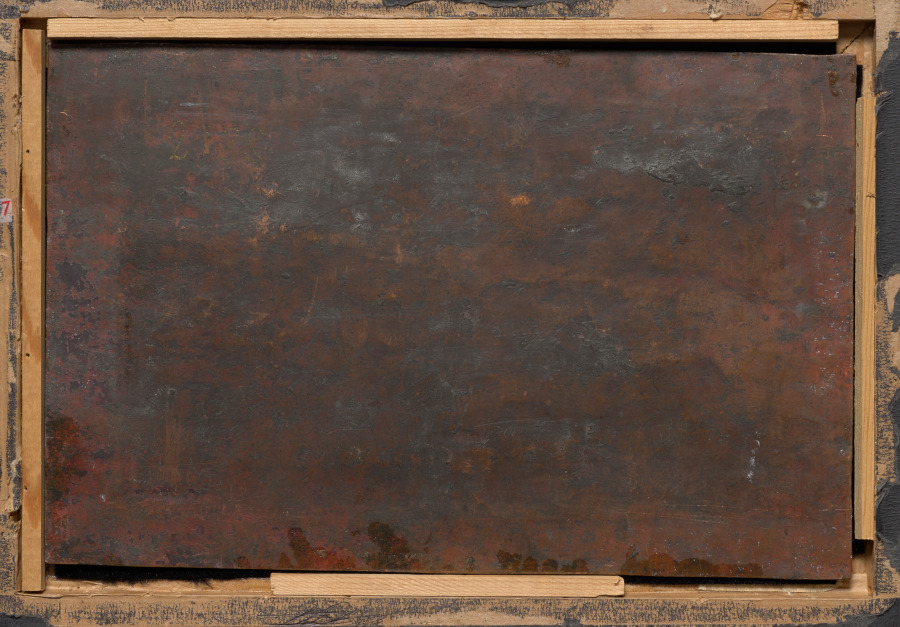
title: Winter Landscape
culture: Netherlands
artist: attributed to Jan Griffier (Dutch, 1648–1718)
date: c. 1680–1718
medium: oil on copper, mounted on wood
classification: Painting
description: A number of scholars have questioned the attribution because Griffier did not generally paint on copper and primarily painted hunting scenes. It may be based on a print, although the source has yet to be identified.